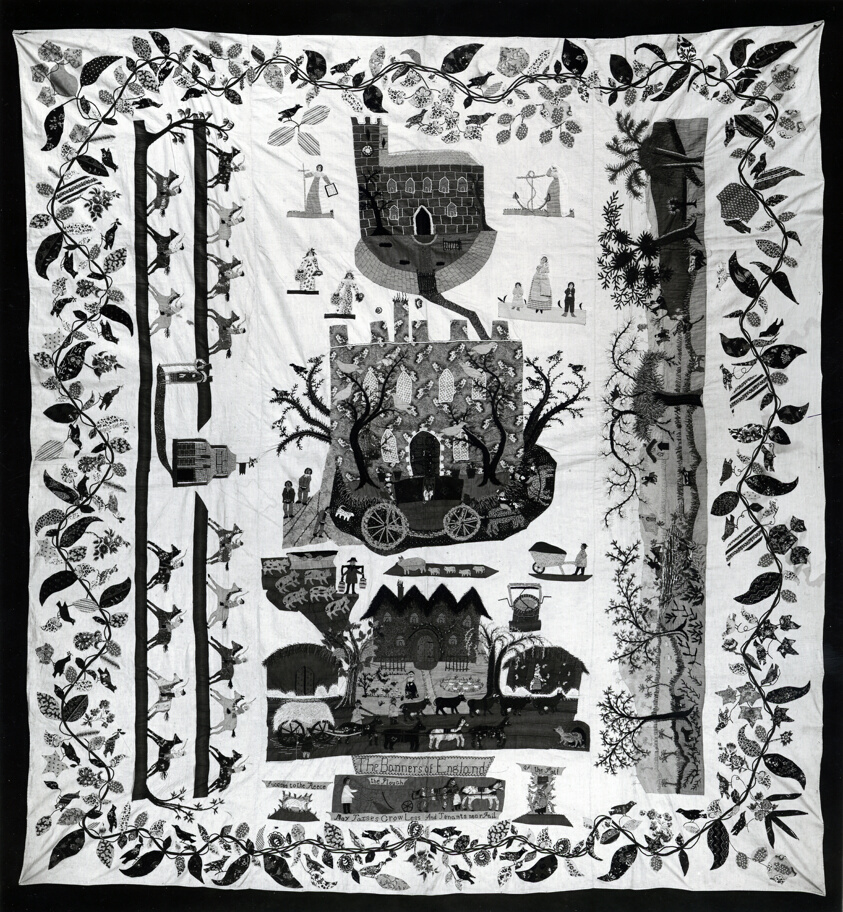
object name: Textile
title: Bedspread (Scenes of English Country Life)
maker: England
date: c. 1830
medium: Cotton, plain weave; quilted; appliquéd with printed cotton swatches and embroidered in cotton and wool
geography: England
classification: textile; needlework - quilt